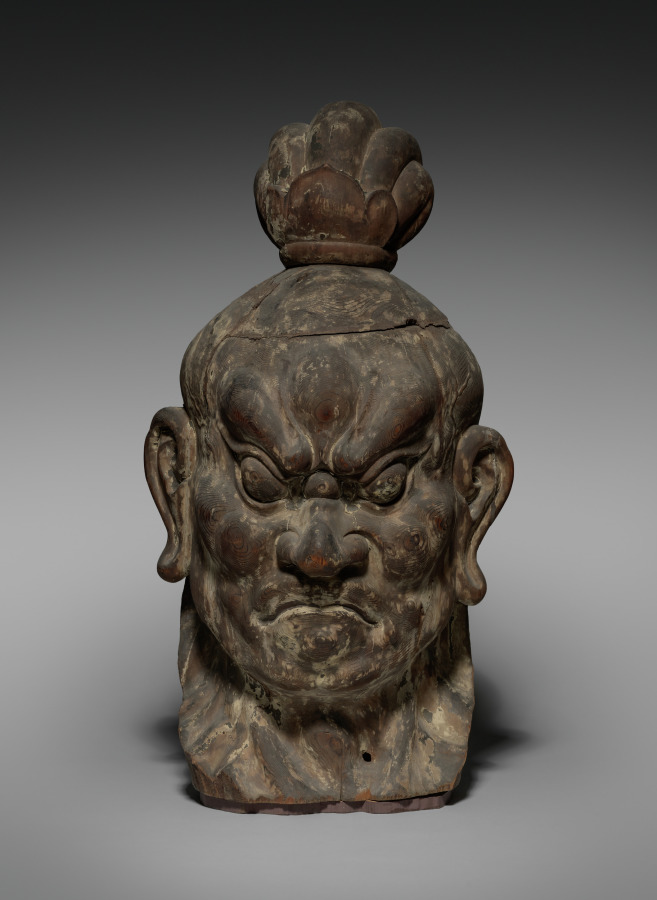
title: Head of Ni-o with Closed Mouth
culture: Japan, Kamakura period (1185–1333)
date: 1200s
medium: wood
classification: Sculpture